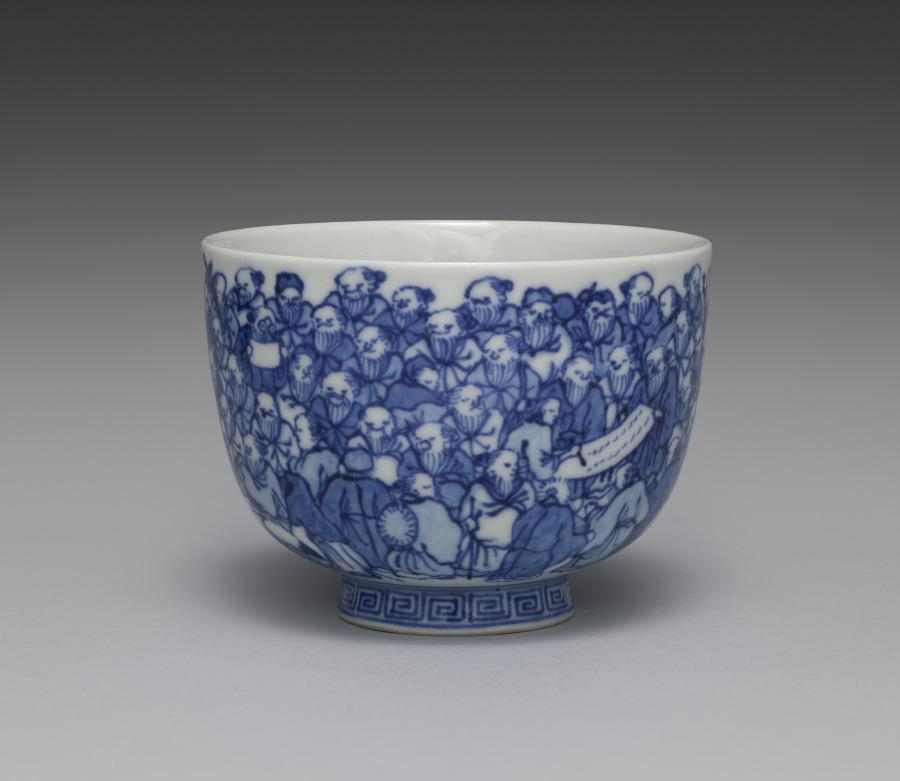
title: Teacup from Teacups with a Hundred Sages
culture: Japan, Meiji period (1868–1912)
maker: Seifū Yohei III (Japanese, 1851–1914)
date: 1893–1914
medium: One from a set of five teacups; porcelain with underglaze blue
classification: Ceramic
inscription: 清風造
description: Each of these five teacups has a painting of identical design in underglaze blue, but as the tiny figures are drawn entirely by hand, each cup has its own personality. The theme of the sencha cups is an assembly of sages or immortals, literally “a hundred venerable [people]” (hyakurō). The myriad figures crowd the scene in groups. The god of longevity, with his tall forehead, sits with his cranes, having flown in from Mt. Penglai on the Isle of the Immortals. Seven long-bearded sages sit around a stone table, chatting and drinking; one is seated on an enormous gourd. Of course, there is a stack of books on the table, and elsewhere, scrolls are being written upon or read—in one case held very close by a sage who is wearing glasses. The design was enormously popular in ceramics made for those engaged in literati culture.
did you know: Seifū Yohei III (1851–1914) produced many works for tea gatherings where people drank Chinese-style leaf-tea (sencha).